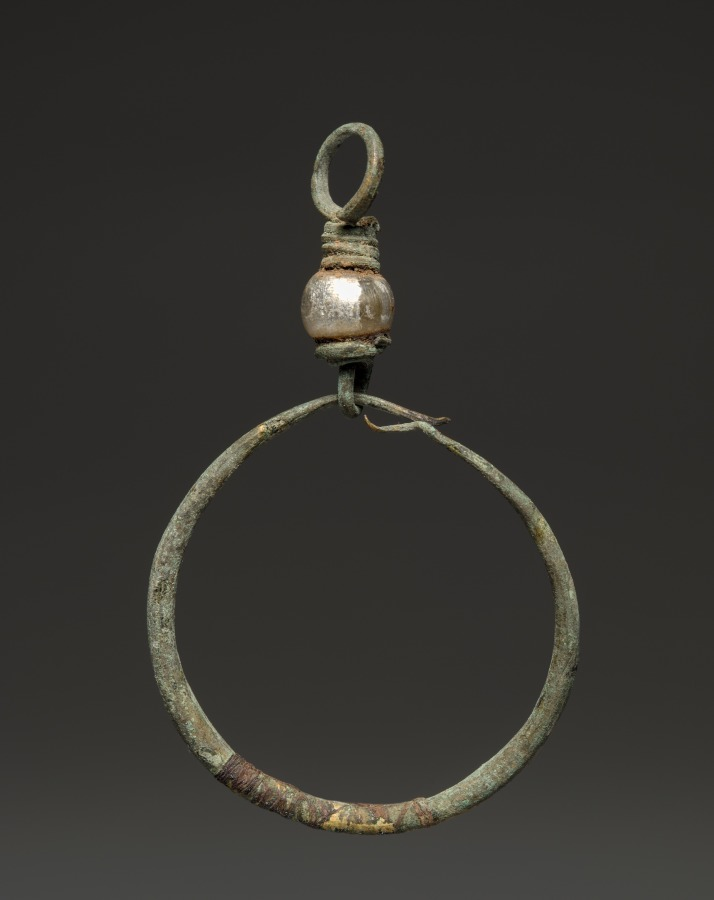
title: Earring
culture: Egypt, Greco-Roman period (332 BCE–395 CE), Roman empire (30 BCE–395 CE)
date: 200–400 CE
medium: bronze and glass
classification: Jewelry